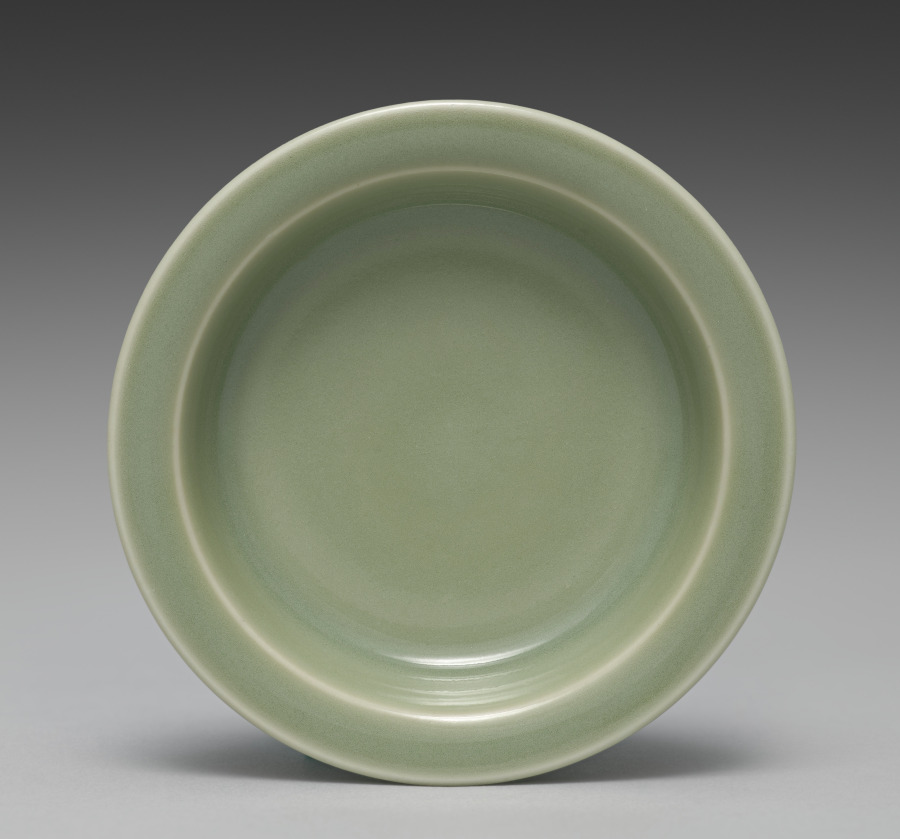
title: Saucer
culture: Japan, Meiji period (1868–1912)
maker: Seifū Yohei III (Japanese, 1851–1914)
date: 1893–1914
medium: One from a set of ten dishes; porcelain with green glaze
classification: Ceramic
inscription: 清風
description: Yohei III’s main output for his sophisticated clientele was in the form of tea sets and dining sets. He created a range of dishes in green glazes. He often produced in pairs, sets of five, or sets of ten. For this set of ten small dishes in a simple, round form that emphasizes the glaze above all, the box lid designates the piece as seiji, or green-glazed porcelain, using a general term for the extensive palette of green glazes often called celadon in English. The box lid further identifies the dishes themselves as tōchō, literally “bean-sized saucers,” a size that makes them suitable for dipping sauces.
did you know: The ten dishes in this set are stored in stacks of five in a two-compartment box.